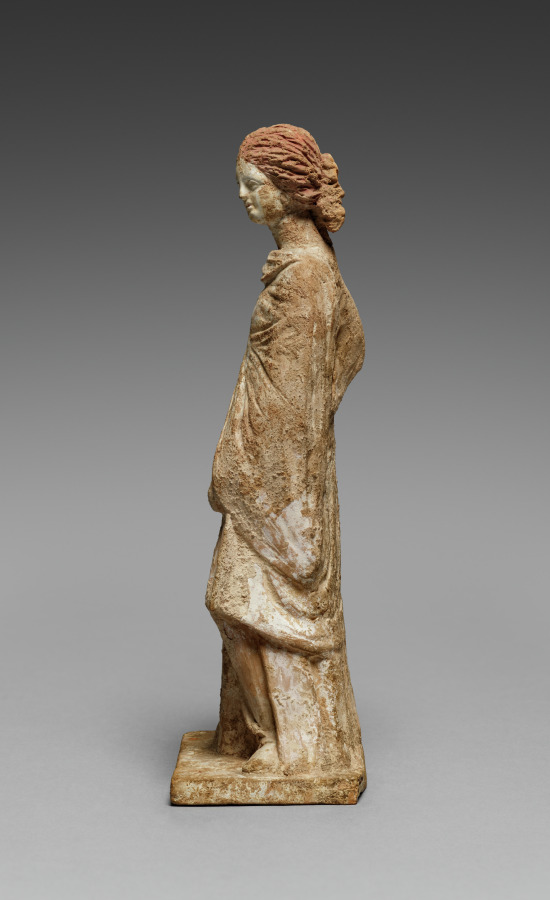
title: Female Figurine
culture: Greece, Tanagra (Boeotia)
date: 330–200 BCE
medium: molded terracotta, painted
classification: Sculpture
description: This figurine depicts an elegantly draped young woman wearing a cloak or himation over a dress called a chiton. The contrast between her sharp elbow and flowing skirts illustrates an interest in the stretch and fold of different fabrics. Originally brilliantly painted, this figurine still has traces of color such as the red hair and the white on her face. The site of Tanagra in central Greece is known for its abundance of terracotta figurines like this one made by mixing and matching different molds.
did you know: This woman’s rolled hairstyle is now called a “melon coiffure.”